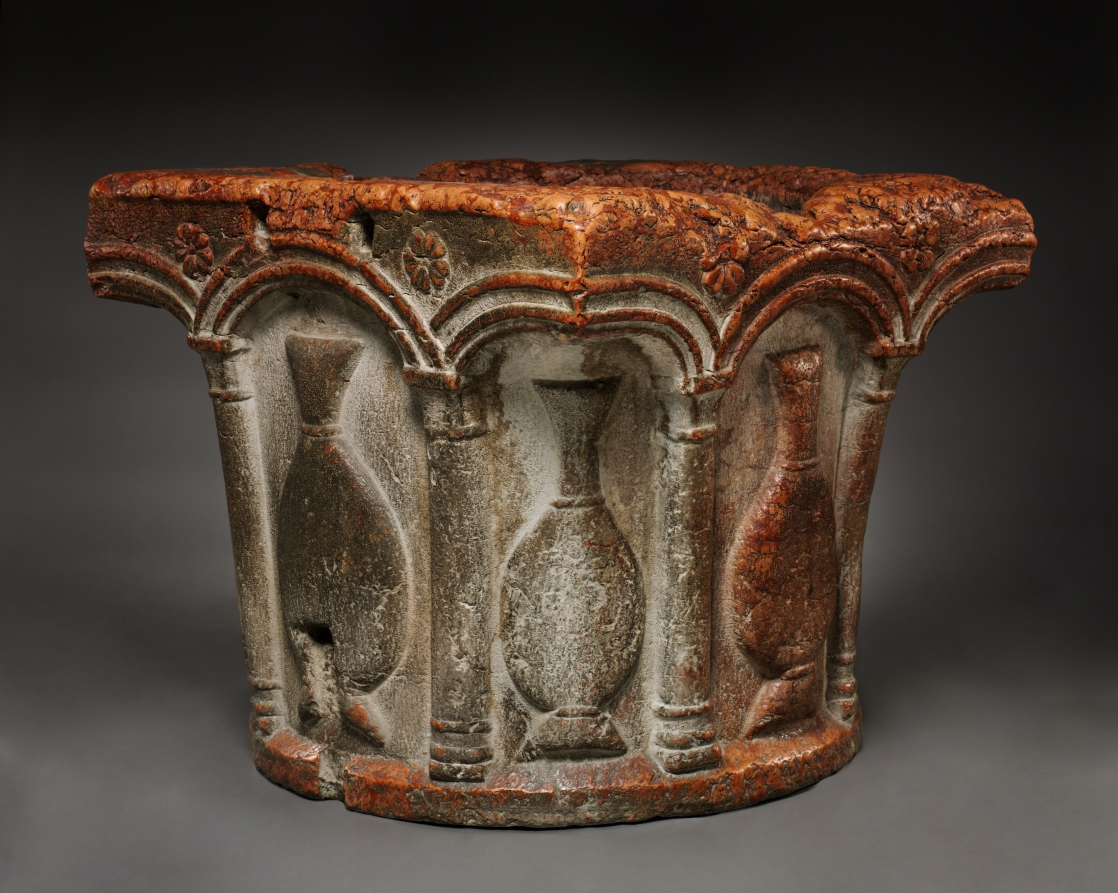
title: Well Head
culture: Italy, probably Verona, 15th century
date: 1400s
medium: pink limestone (called "Verona Marble")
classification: Sculpture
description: A well head is an architectural element that protects the mouth of a well. This example is both decorative and functional. The durable pink limestone well head facilitated access to the water whose restorative nature is echoed in the flowers and vases that ornament its surface.